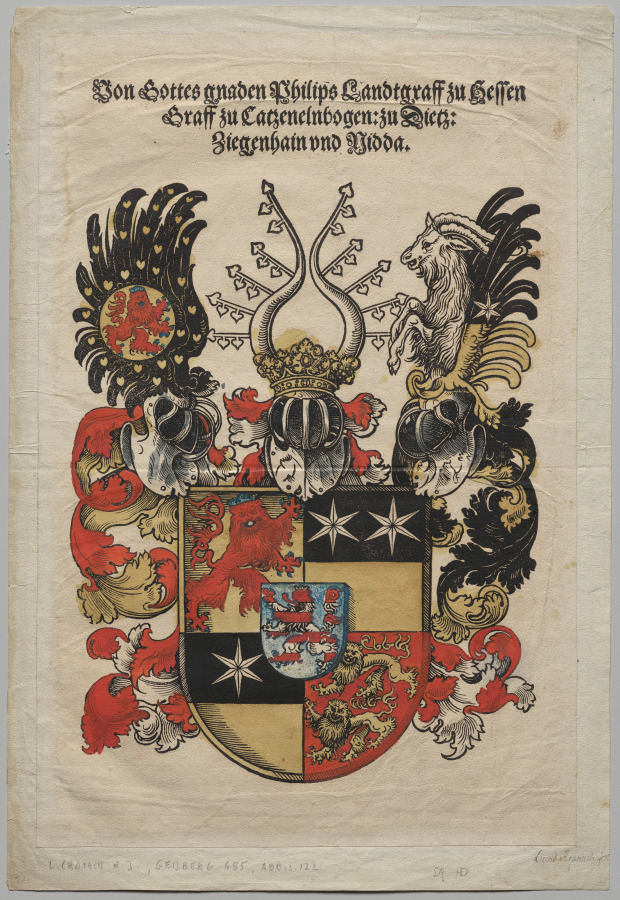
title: Coat of Arms of Philip, Landgrave of Hesse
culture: Germany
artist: Lucas Cranach (German, 1515–1586)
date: 1546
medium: Hand-colored woodcut with letterpress text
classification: Print